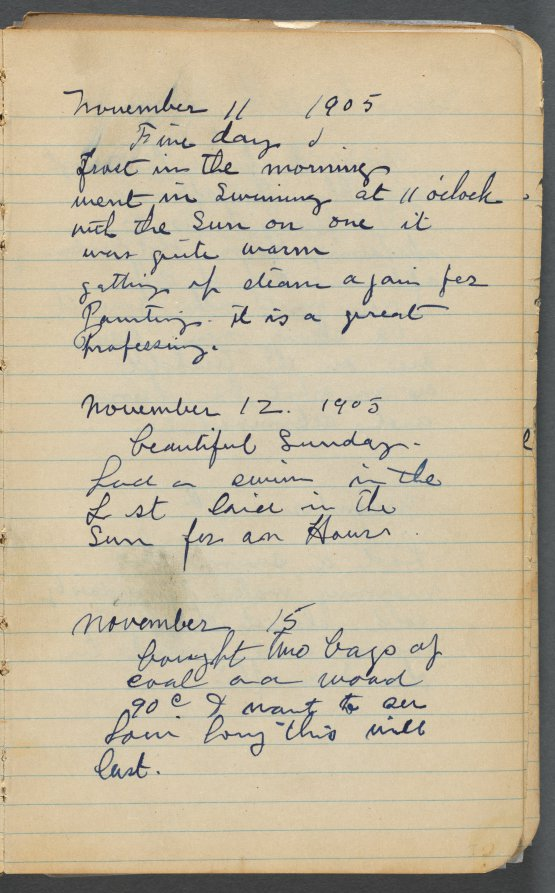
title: Sketchbook, page 007: Notes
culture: America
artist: Maurice Prendergast (American, born Newfoundland [now Canada], 1858–1924)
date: 1905–10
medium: graphite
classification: Bound Volume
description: This sketchbook contains 69 pages of drawings, a diary largely devoted to the state of the artist's health, and a three-page discourse on the nature of genius and ideas.